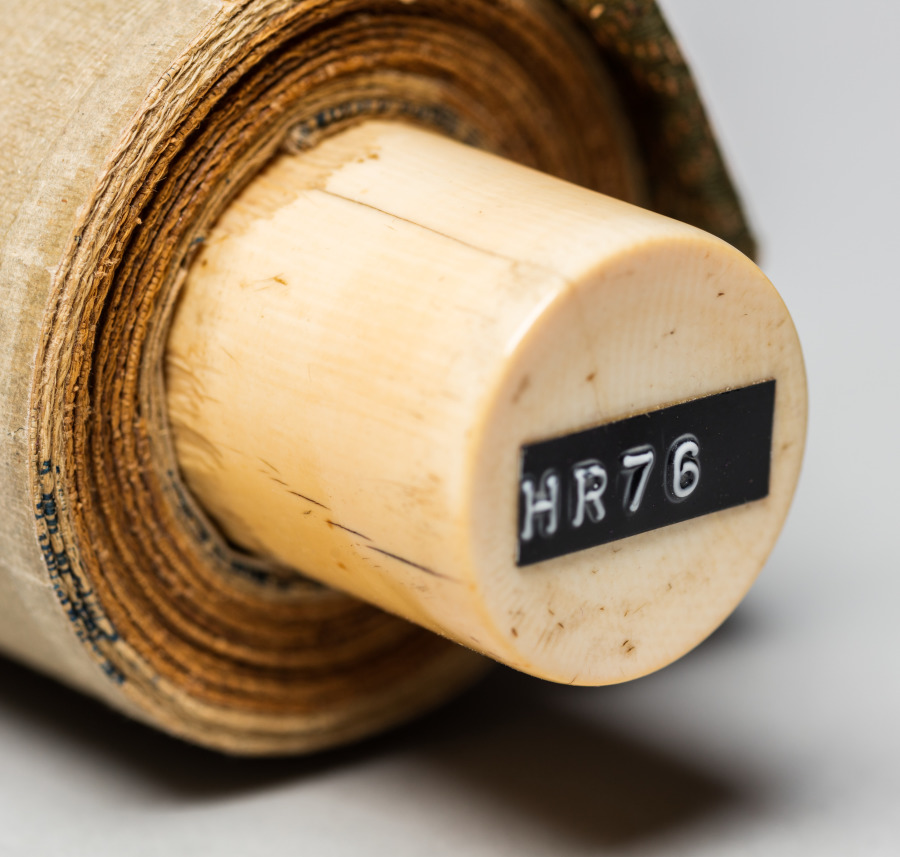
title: Landscape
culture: Japan, Edo period (1615–1868)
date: early 1600s to mid-1800s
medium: hanging scroll; ink on paper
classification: Painting